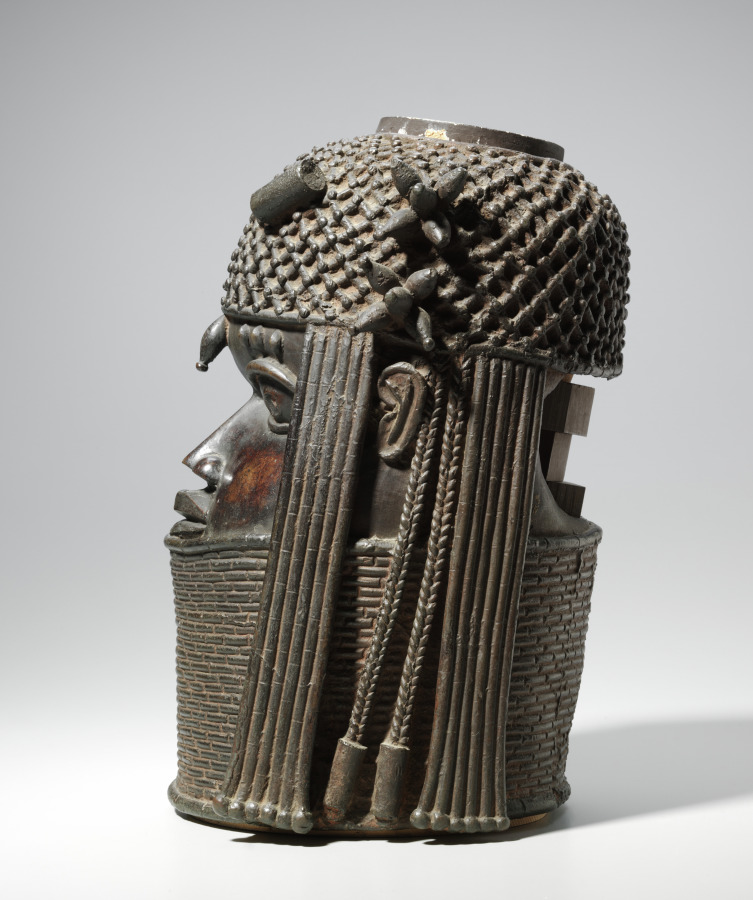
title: Ancestral Commemorative Head (uhunmwun-elao)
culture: Nigeria, Benin Kingdom, Ẹdo peoples, members of the Igun Eronmwon (royal brasscasters) guild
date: possibly mid-1500s or early 1600s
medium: Copper alloy and iron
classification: Sculpture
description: Brass heads are among many objects a new Ọba commissions when dedicating a shrine to their predecessor. This head of an Ọba wears layered necklaces of royal coral beads. Tubular beads adorn both the netted cap and slender braids alongside his temples. While representing an individual, his facial features and calm expression are idealized. The thickly cast head once supported a tusk. Immune to corrosion, brass symbolizes royal permanence. A personal religious object, this head sat on an ancestral altar in the Ọba’s palace. Like many works taken from Benin altars, this contrasts with its present-day public display in an American museum.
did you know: The obas (kings) of the Benin Kingdom still wear coral headpieces and jewelry like this sculpted head depicts.